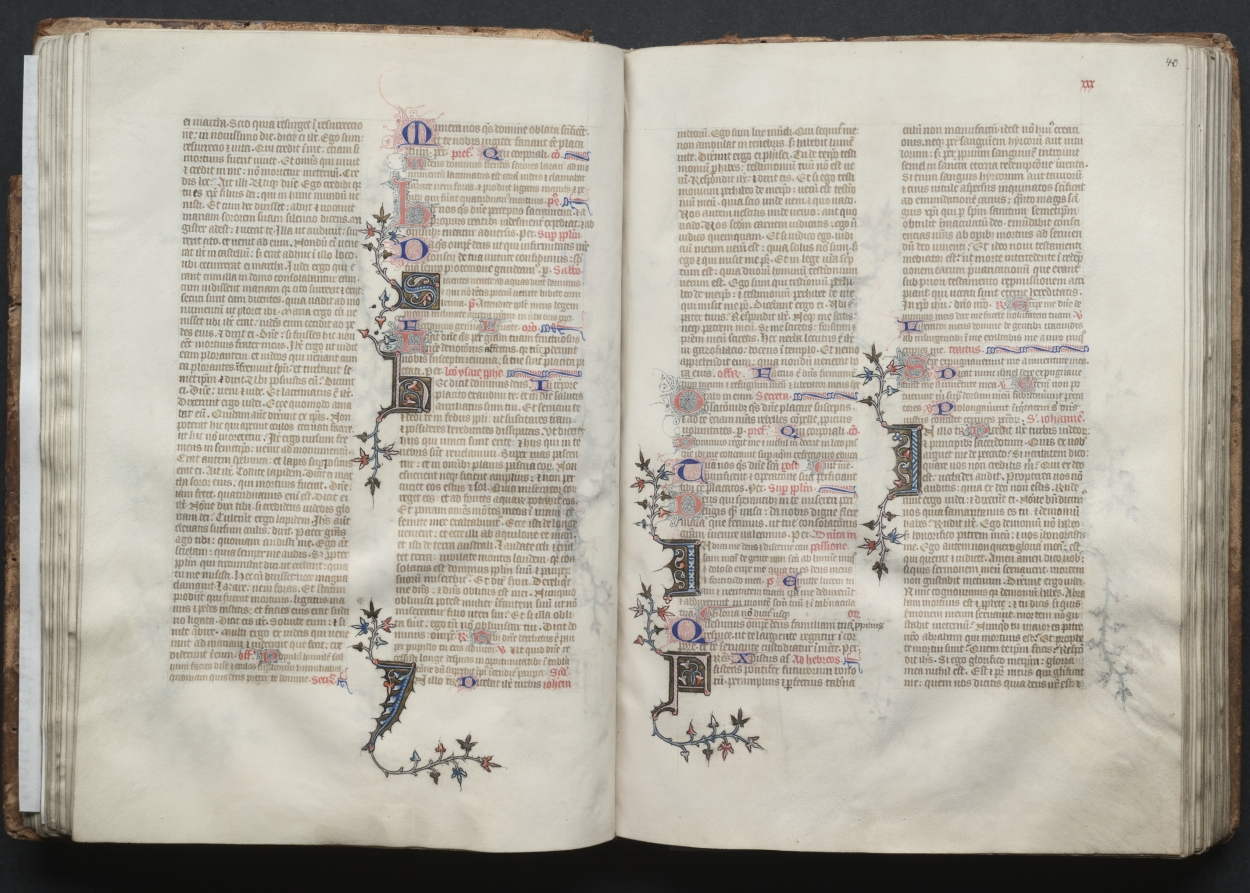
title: The Gotha Missal: Fol. 40r, Text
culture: France, Paris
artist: Master of the Boqueteaux (French)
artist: and Workshop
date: c. 1375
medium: ink, tempera, and gold on vellum; blind-tooled leather binding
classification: Bound Volume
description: The style and quality of this manuscript's decoration is typical of deluxe Parisian books made for aristocratic or royal patrons. Most of the book's decoration appears to be the work of the Master of the Boqueteaux, an artist active at the court of King Charles V (died 1380). His style was apparently shared by a number of book illuminators working in and around Paris. It is very possible that the Gotha Missal belonged to Charles V, but is not provable because the manuscript has no royal portraits and lacks a colophon. Given the book's magnificent decoration, however, it would seem that it was produced for a Valois prince, if not for the king himself. The manuscript receives its name from the German dukes of Gotha, its later owners.